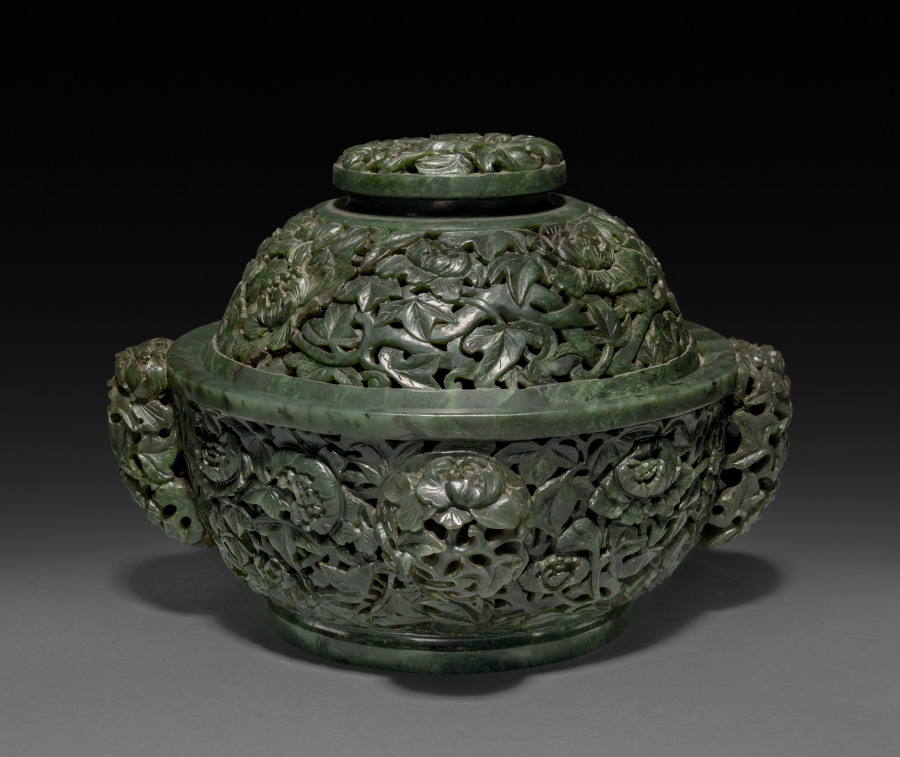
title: Fragrance Container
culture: China, Qing dynasty (1644–1911), Qianlong reign (1736–95)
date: 1736–95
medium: jade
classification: Jade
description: In the Qing (1644–1911) dynasty, luxury items became more affordable to larger parts of the society, including women, merchants, and literati in non-official positions. Imperial patronage and a growing urban population encouraged consumption of luxury goods and local craftmanship. This spinach-green jade incense burner has pierced floral designs and four pierced floral handles. It illustrates the superb carving skills and the creative mind of its accomplished creator, who sought clients on a competitive market